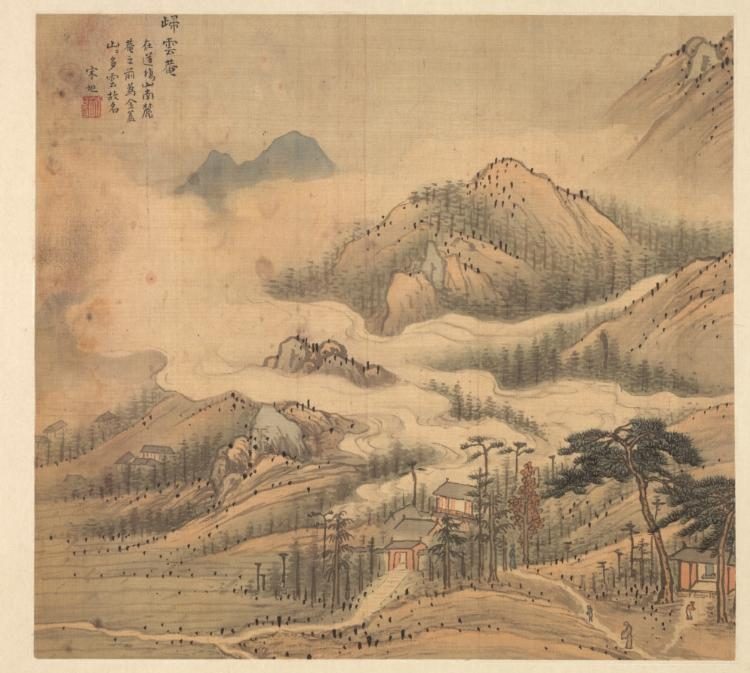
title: Guiyun Shrine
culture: China, Jiaxing, Ming dynasty (1368–1644)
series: Eighteen Views of Huzhou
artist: Song Xu (Chinese, 1525-c. 1606)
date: c. 1588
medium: Album leaf; ink and color on silk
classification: Painting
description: By the 1500s, visits to historic and scenic sites in the lower Yangzi delta stimulated an increase of printed illustrated travel books. Topographical depictions of local scenery flourished. Leaves from this album illustrates sites around Lake Tai of the two adjacent counties Changxing and Wuxing (modern Huzhou). Song Xu, who lived intermittently in Jiaxing and Songjiang, must have passed through Wuxing by boat and thus knew the region. The paintings are inscribed with gazetteerlike notations, suggesting that the album was produced for clients as commemorative works, a travel guide, or for “armchair travel” (woyou) in one’s mind.